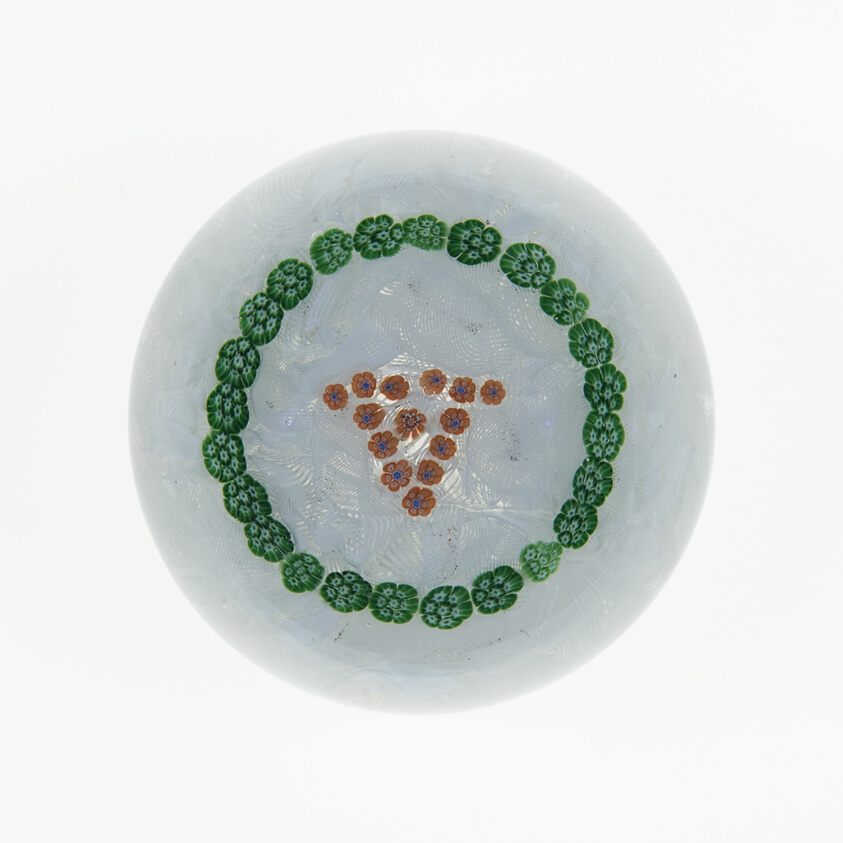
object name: Glass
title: Paperweight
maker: Baccarat Glassworks (Cristalleries de Baccarat); Lorraine, France, founded 1764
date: c. 1845–60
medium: Glass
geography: Baccarat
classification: paperweight; glass